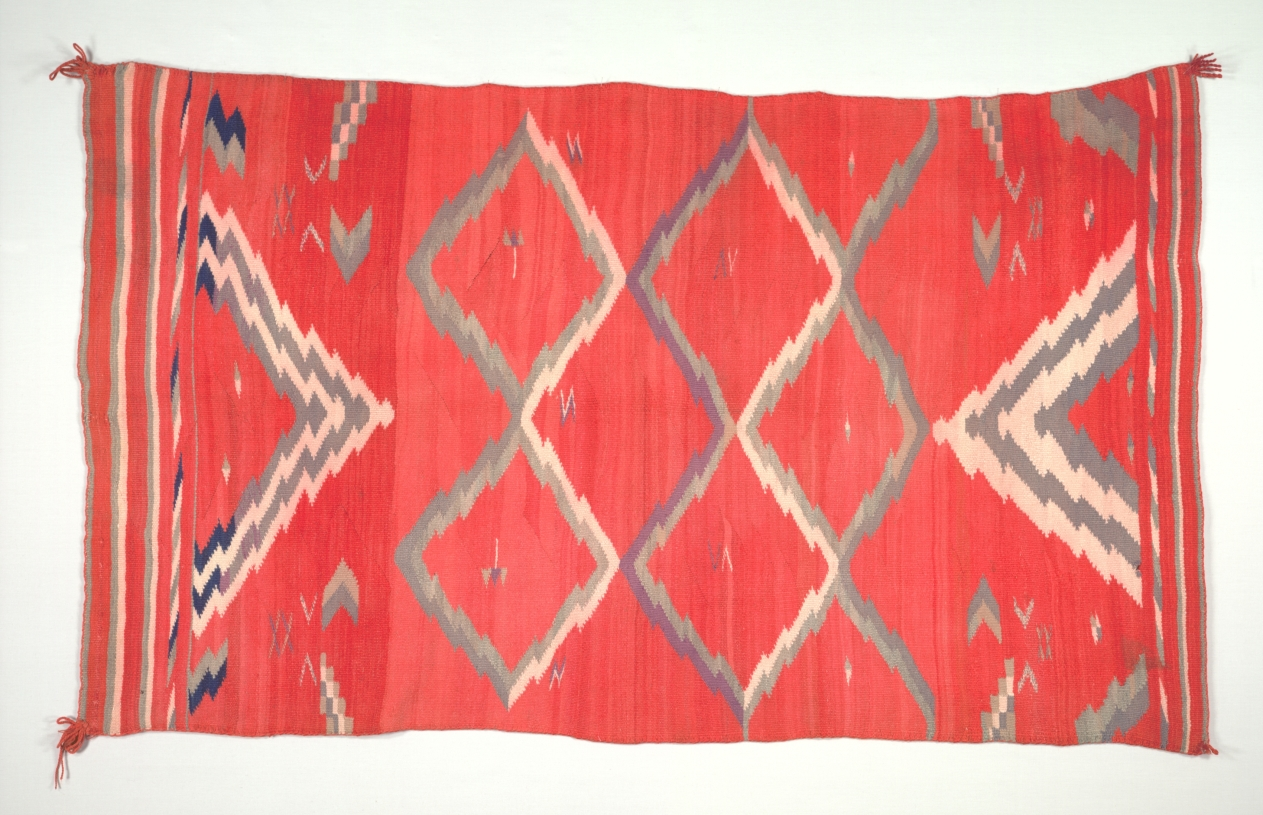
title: Wearing Blanket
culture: Native North American, Southwest, Diné (Navajo), female artist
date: c. 1875–80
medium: Wool (handspun, Germantown, and bayeta); tapestry weave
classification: Textile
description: This blanket was created during the late 1800s, when weavers in the Southwest began to shift from making garments for Indigenous use, including trade, to additionally create items for non-Native collectors. In this new market, traditional wearing blankets, which were worn around the shoulders, were marketed as rugs.